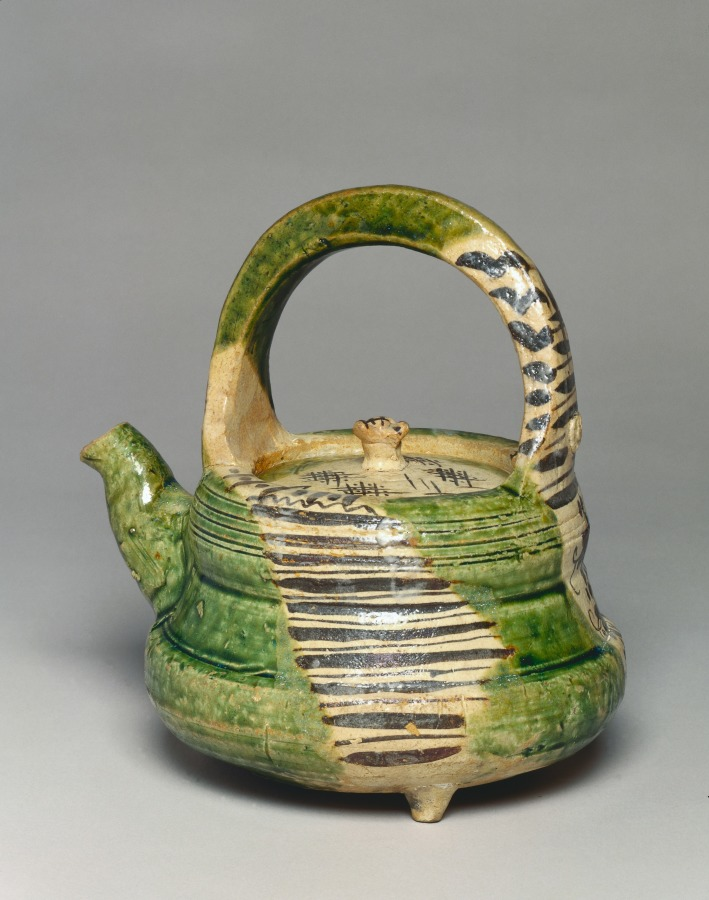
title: Ewer (Suichū)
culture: Japan, Momoyama period (1573–1615)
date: early 1600s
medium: Glazed stoneware with iron oxide underglaze slip (Mino ware, Oribe type)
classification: Ceramic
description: This ewer was made to replenish the jar that holds water for rinsing teabowls and filling the iron kettle at tea gatherings. Highly abstracted pine trees, cascading ivy, stripes, and grids make up the designs in underglaze iron oxide, while the overall surface alternates between a transparent glaze and a green glaze characteristic of some Oribe tea wares.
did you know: Oribe wares are named for the tea master Furuta Oribe, who initiated the flamboyant designs that characterize them.